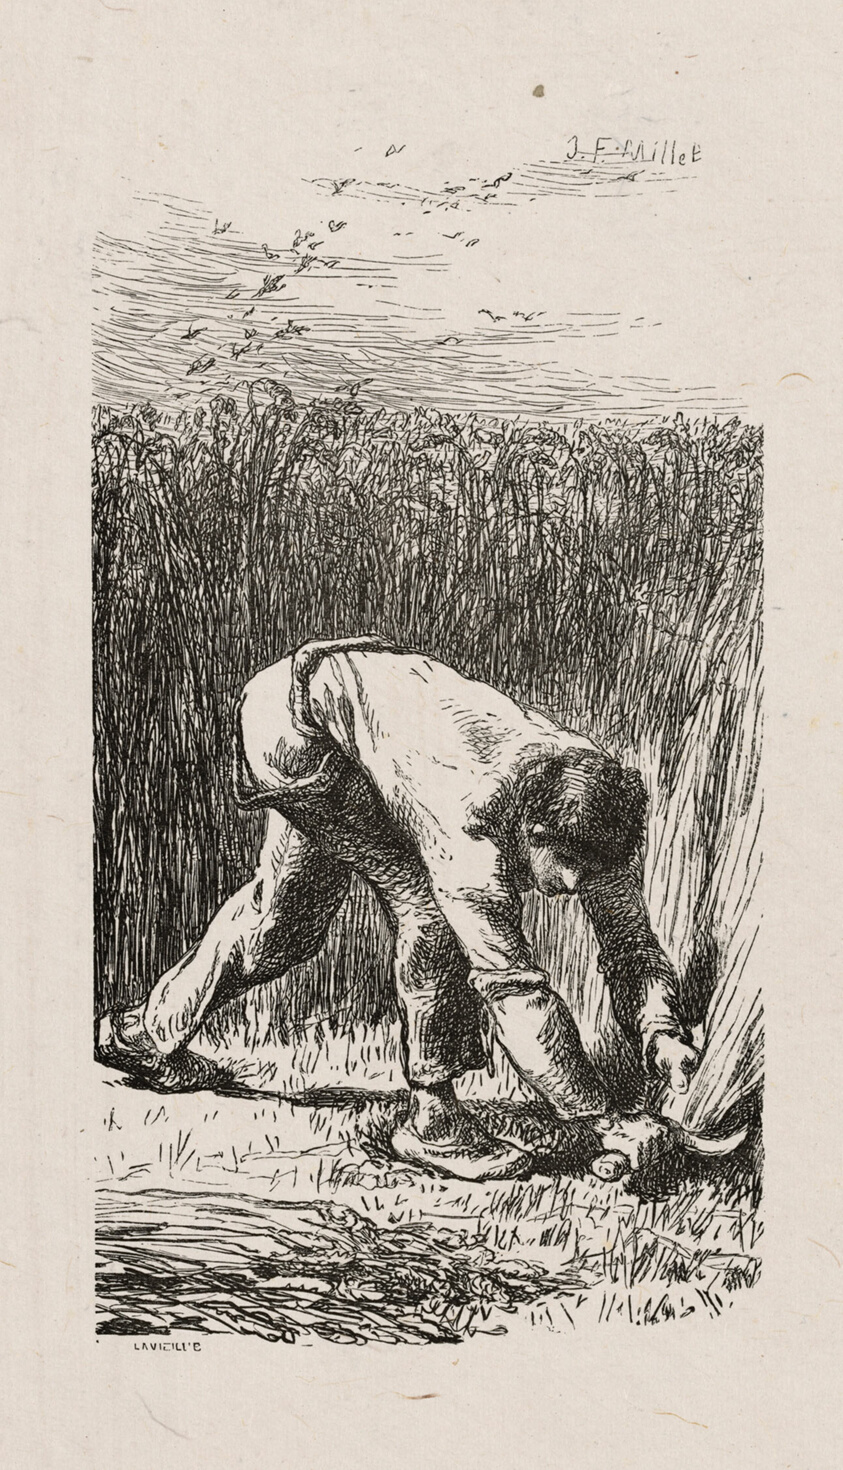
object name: Print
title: Reaper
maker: Jacques Adrien Lavieille (French, 1818-1862); after Jean François Millet (French, 1814-1875)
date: 1853, after drawing made in 1852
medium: Wood engraving in black on gray China paper, laid down on ivory wove paper (chine collé)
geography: France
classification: wood engraving; print; prints and drawing